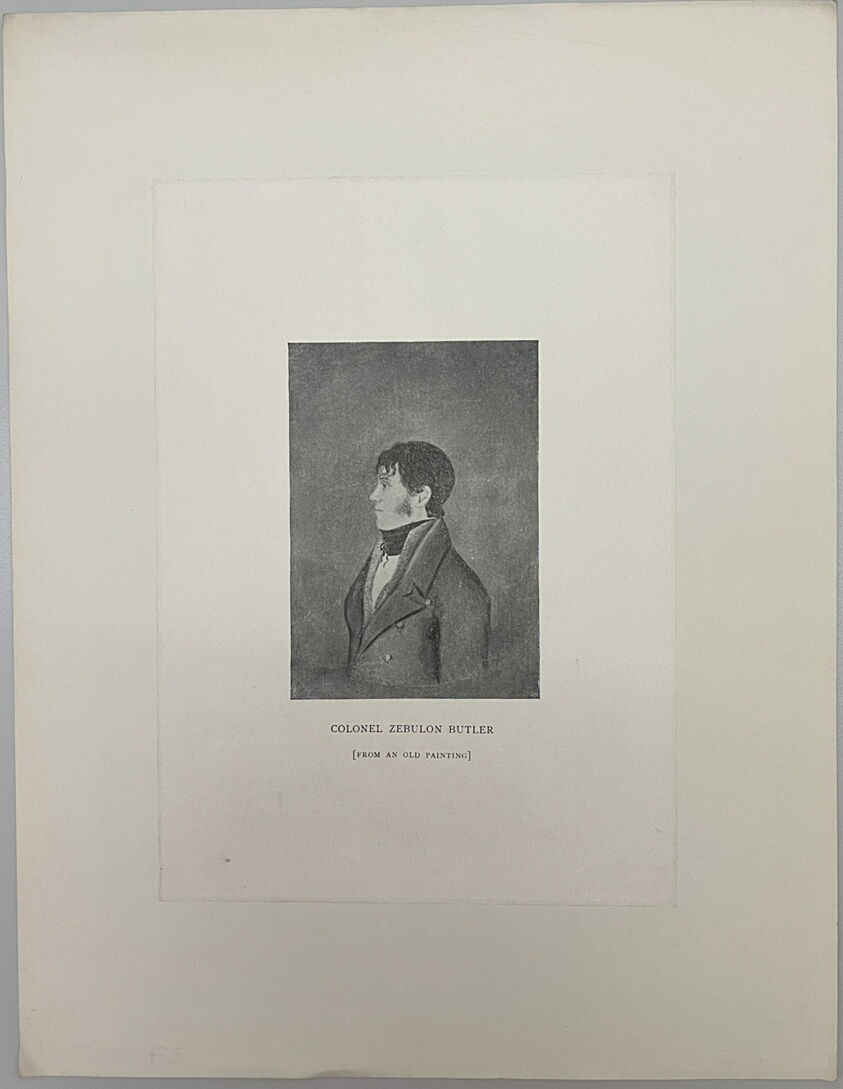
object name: Print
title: Colonel Zebulon Butler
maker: Artist Unknown (Likely American or British, 19th century)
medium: Photolithograph on paper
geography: United States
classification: reproduction; print; prints and drawing